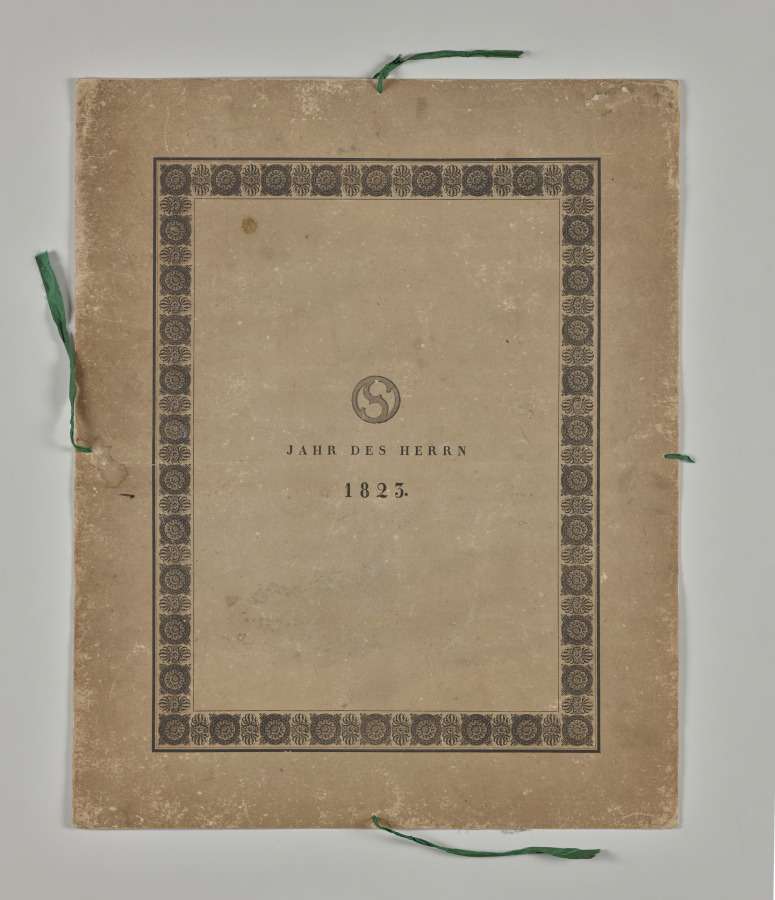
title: Seven Areas from Salzburg and Berchtesgaden. Arranged according to the seven days of the week, connected by two allegorical sheets (Slipcover)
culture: Germany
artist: Ferdinand Olivier (German, 1785–1841)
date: 1818–23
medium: Original slipcase cover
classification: Portfolio